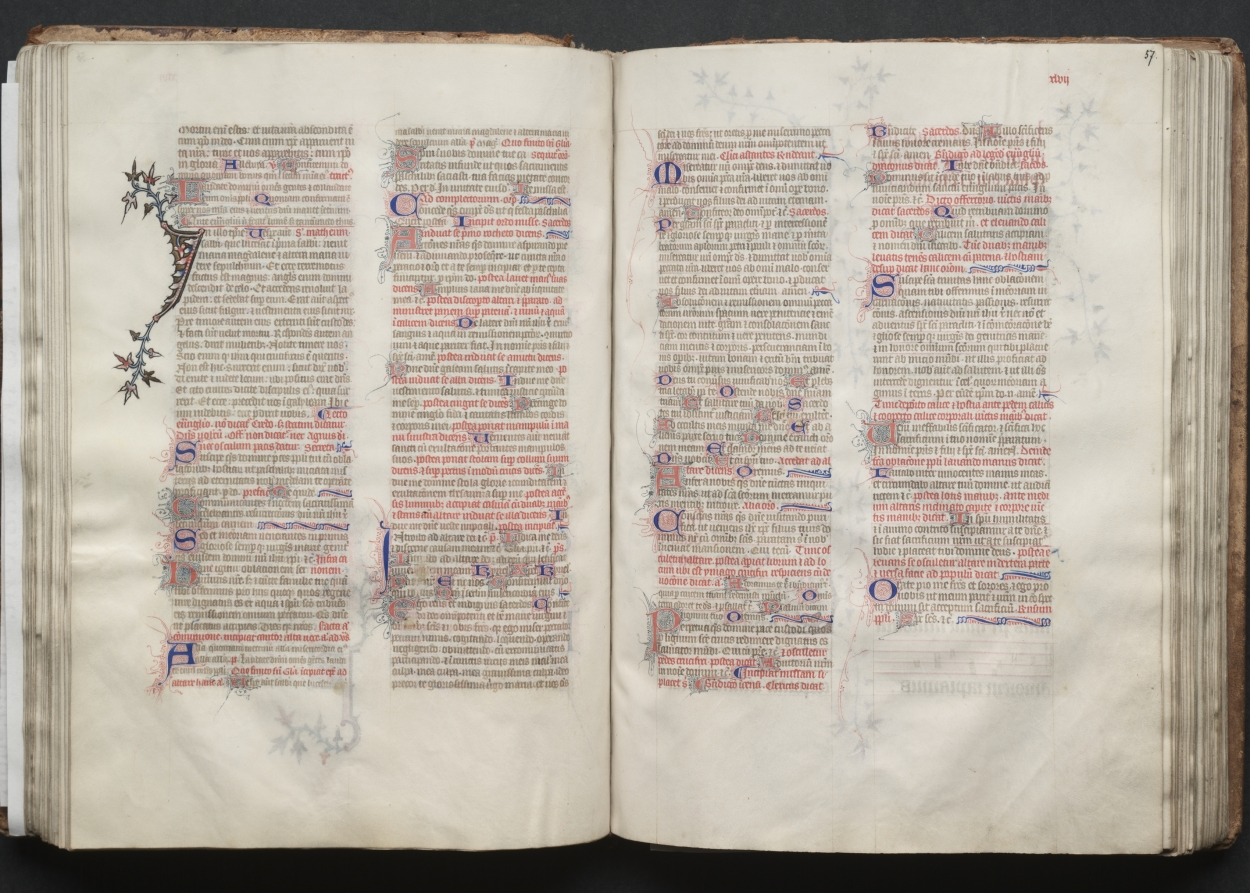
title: The Gotha Missal: Fol. 57r, Text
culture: France, Paris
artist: Master of the Boqueteaux (French)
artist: and Workshop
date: c. 1375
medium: ink, tempera, and gold on vellum; blind-tooled leather binding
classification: Bound Volume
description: The style and quality of this manuscript's decoration is typical of deluxe Parisian books made for aristocratic or royal patrons. Most of the book's decoration appears to be the work of the Master of the Boqueteaux, an artist active at the court of King Charles V (died 1380). His style was apparently shared by a number of book illuminators working in and around Paris. It is very possible that the Gotha Missal belonged to Charles V, but is not provable because the manuscript has no royal portraits and lacks a colophon. Given the book's magnificent decoration, however, it would seem that it was produced for a Valois prince, if not for the king himself. The manuscript receives its name from the German dukes of Gotha, its later owners.